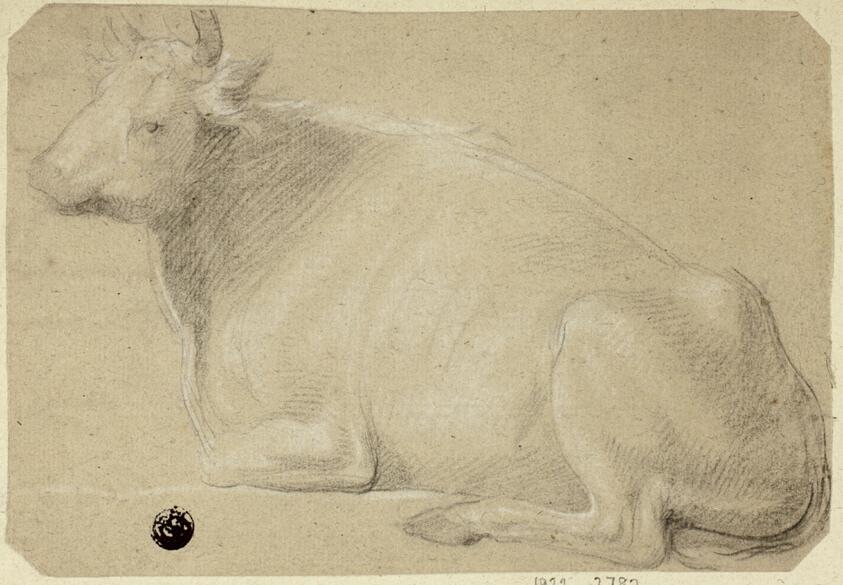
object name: Drawing and Watercolor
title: Cow Lying on Haunches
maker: Unknown Artist; English, 19th century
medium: Charcoal, heightened with white chalk, on buff laid paper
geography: United Kingdom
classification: charcoal; paper; drawings (visual works); prints and drawing